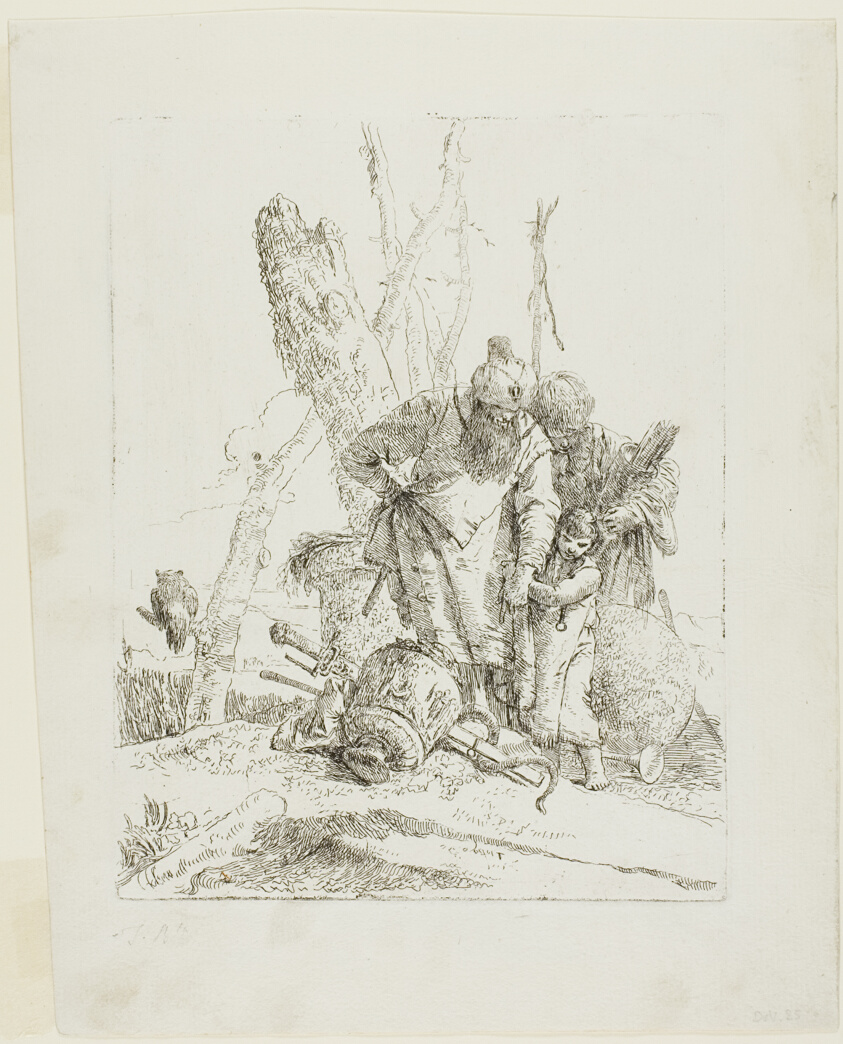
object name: Print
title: Two Astrologers and a Boy, from Scherzi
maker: Giovanni Battista Tiepolo (Italian, 1696–1770)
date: 1735–40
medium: Etching on paper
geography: Italy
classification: etching; print; prints and drawing